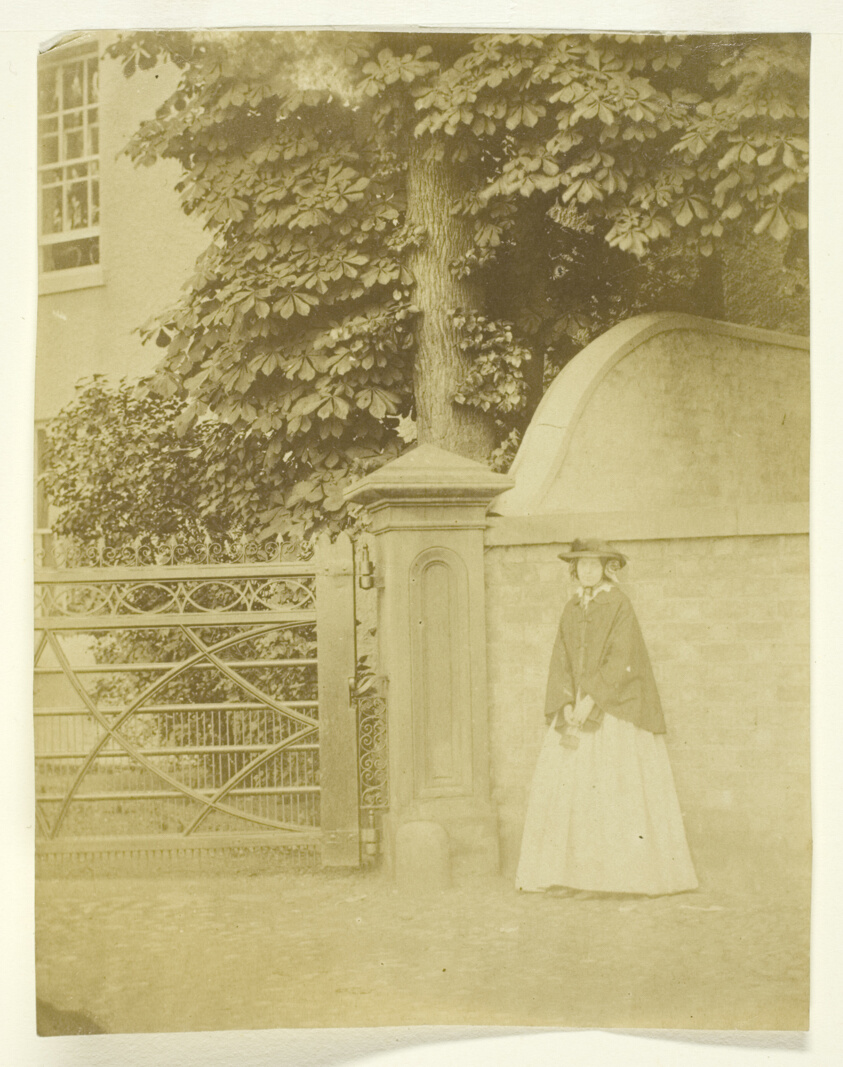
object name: Photograph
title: Mrs. Craik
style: 19th century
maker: Artist unknown, possibly Benjamin Mulock (English, 1829–1863); English, 19th century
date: 1850/59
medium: Albumen print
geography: England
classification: salted paper print; photographic process; photography; photograph